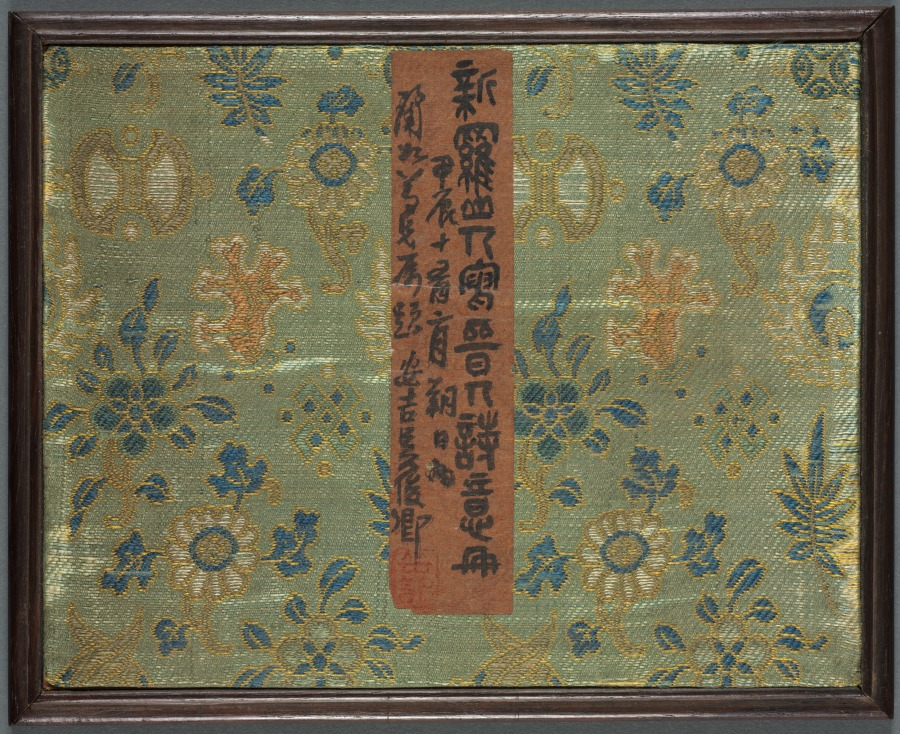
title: Album of Landscape Painting Illustrating Old Poems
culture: China, Qing dynasty (1644–1911)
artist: Hua Yan (Chinese, 1682–c. 1765)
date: 1745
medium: Album of twelve leaves; ink and light color on paper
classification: Painting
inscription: 新羅山人畫冊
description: Hua Yan is one of the Eight Eccentrics of Yangzhou, who rejected orthodox ideas about painting.